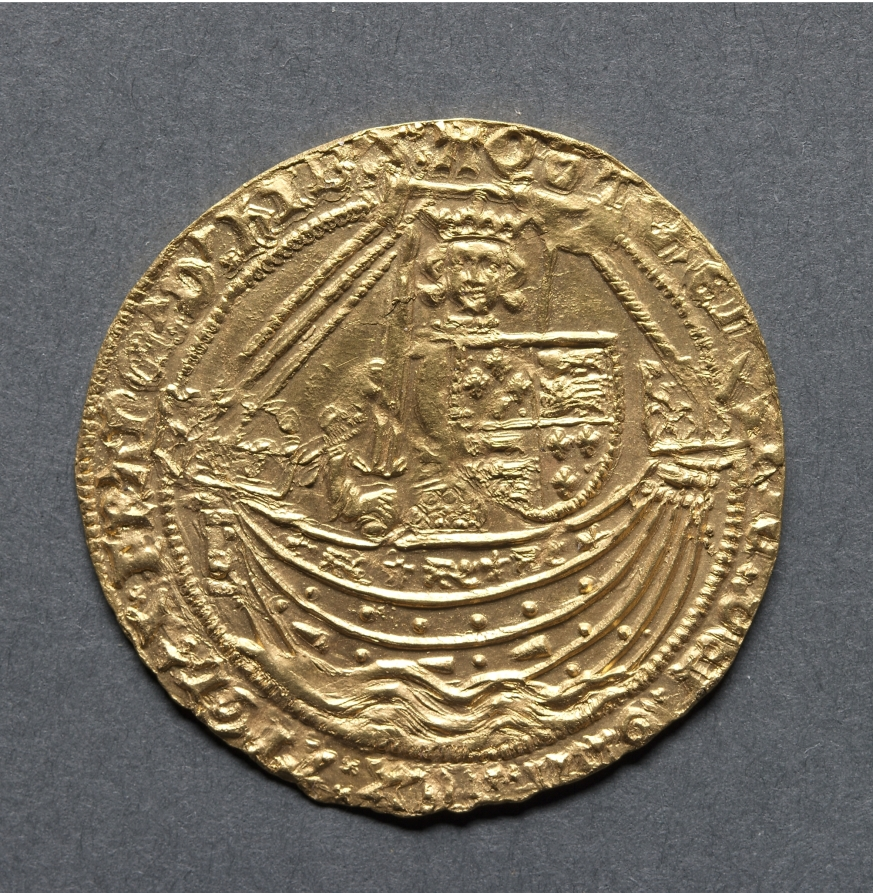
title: Noble: Henry V in Ship with Shield of Arms (obverse)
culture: England, Henry V, 1413-1422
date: 1413–1422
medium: gold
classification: Coins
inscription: HENRIC DI GRA REX ANGL X FRANC D HIB